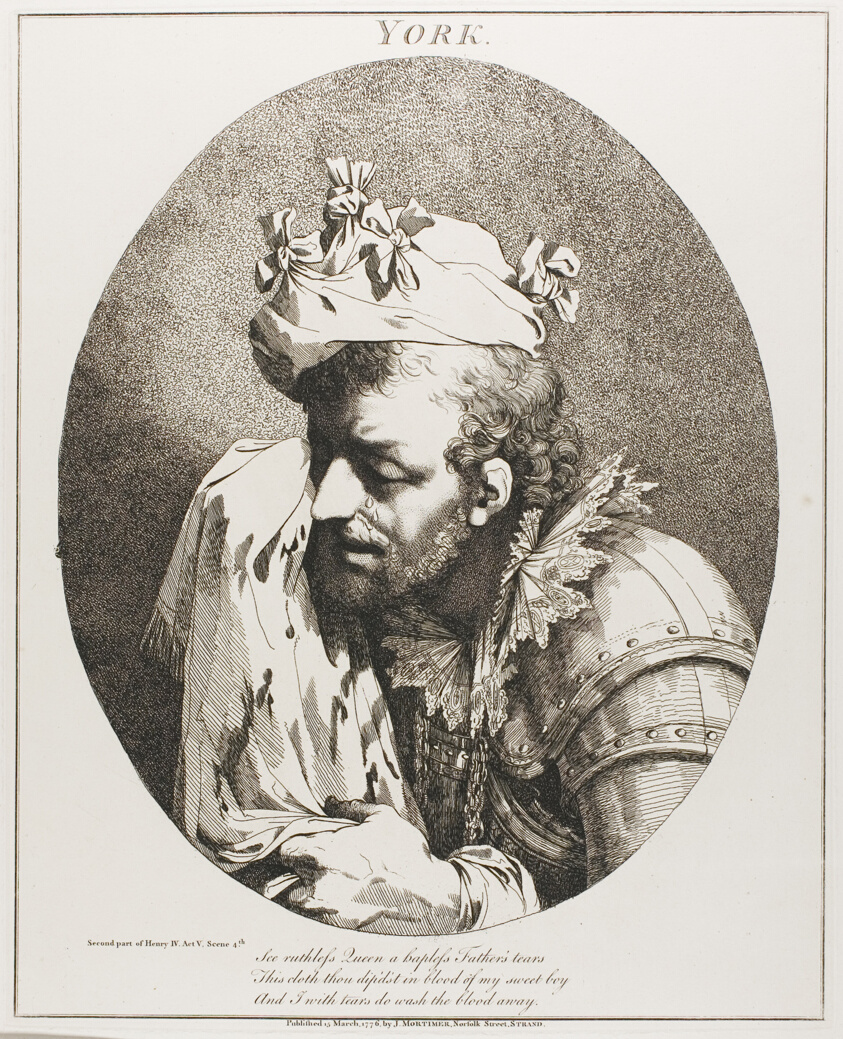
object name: Print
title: York, from Twelve Characters from Shakespeare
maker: John Hamilton Mortimer (English, 1740-1779)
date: originally published March 15, 1776, published 1809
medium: Etching on cream wove paper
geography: England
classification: etching; print; prints and drawing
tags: Henry IV, part II, literature, prints and drawings